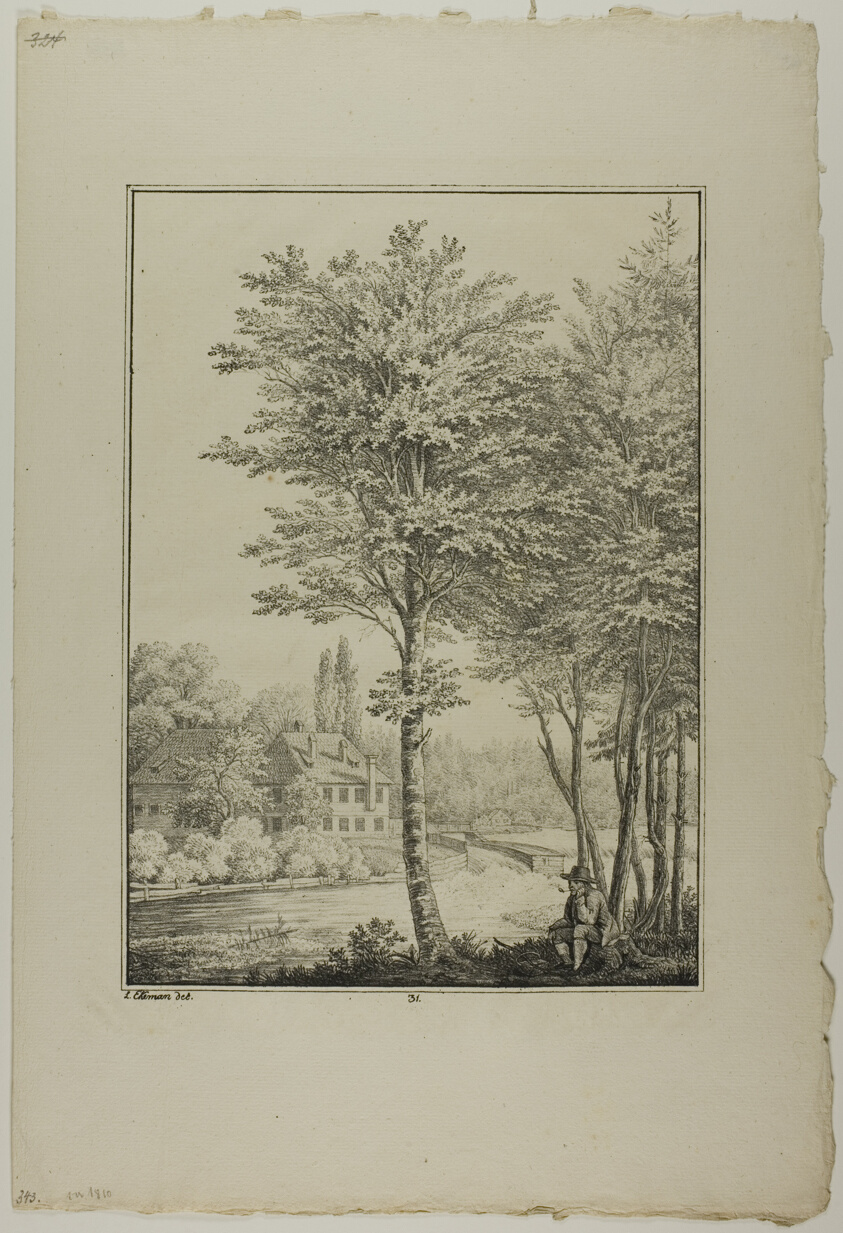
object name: Print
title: Plate 31 from Blatt Baum und Landschafts Studien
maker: Lorenz Ekemann Alesson (Swedish, 1791-1828)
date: c. 1810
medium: Lithograph on paper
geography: Sweden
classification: lithograph; print; prints and drawing